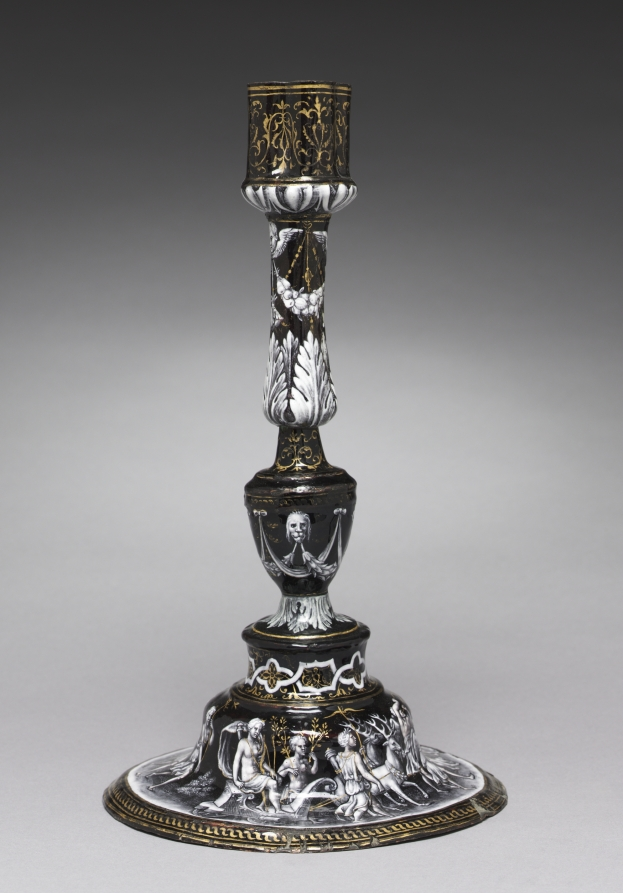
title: Candlestick Depicting the Triumph of Diana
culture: France, Limoges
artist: attributed to Jean II de Court (French, before 1583)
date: c. 1565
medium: painted enamel (grisaille) on copper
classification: Enamel